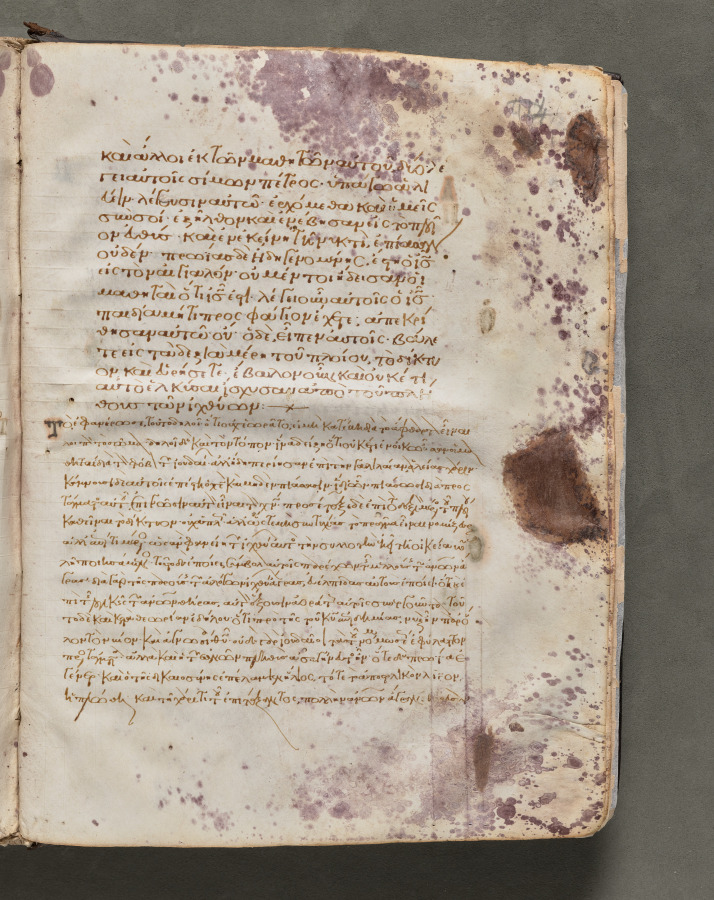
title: Text, folio 422 (recto), from a Gospel Book with Commentaries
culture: Byzantium, Constantinople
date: c. 1000–1100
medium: ink, tempera, and gold on vellum; leather binding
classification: Bound Volume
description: Each of the four gospels in this book opens on a page with brilliantly illuminated borders depicting the author of the text as well as birds—principally peacocks, symbols of the immortality of the soul—and fountains, representing the fountain of life and the salvation of the soul. This volume consists of 428 leaves with texts in Greek. Its level of sophistication suggests that it was probably written and decorated in a monastery in Constantinople.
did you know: Gospel books were carried in procession through Byzantine churches.